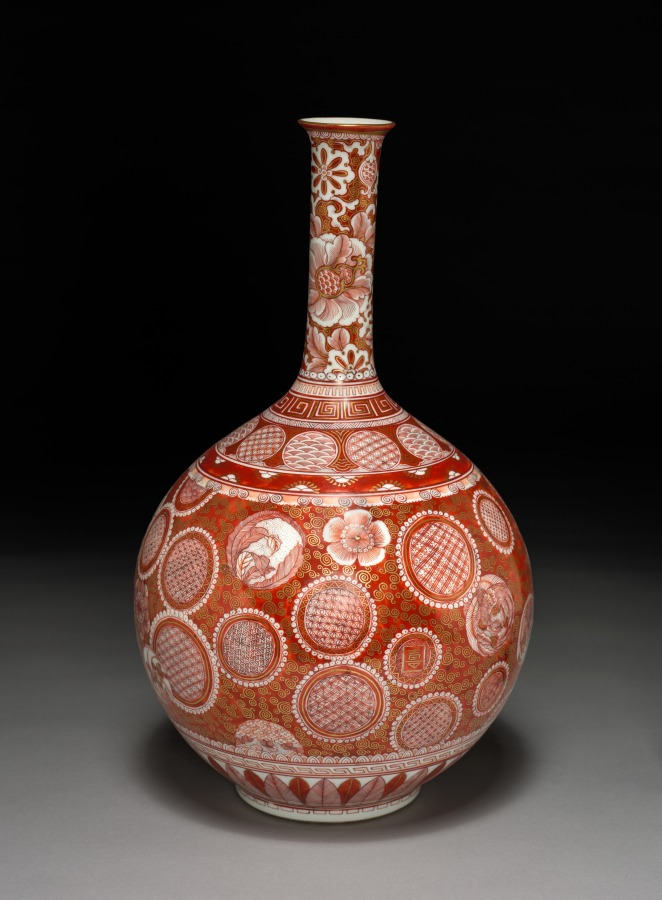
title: Vase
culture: Japan, Edo period (1615–1868)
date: early to mid-1800s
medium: porcelain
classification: Ceramic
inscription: on the base in red are "FUKU" (happiness) in a square and "ICHI-KA" in a fish.